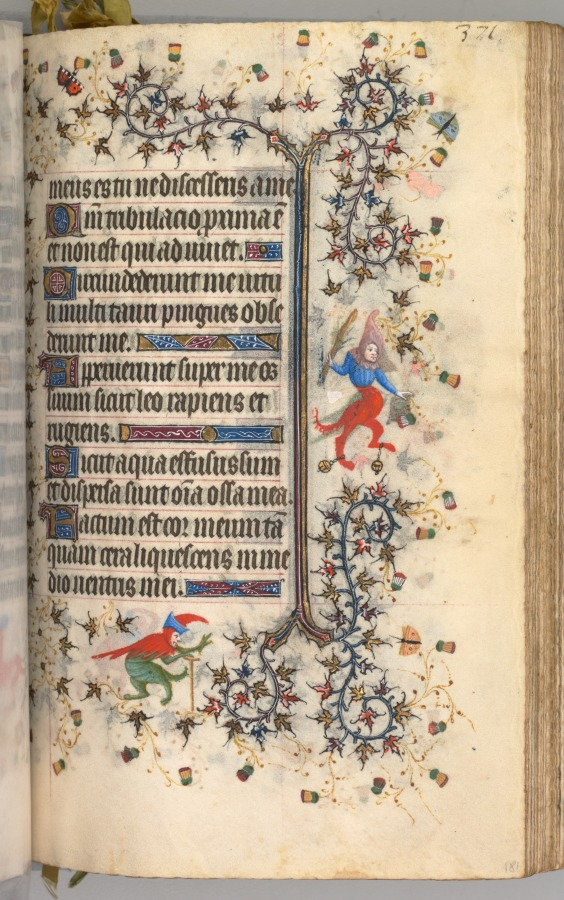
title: Hours of Charles the Noble, King of Navarre (1361-1425): fol. 181r, Text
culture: France, Paris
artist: Master of the Brussels Initials and Associates (French)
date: c. 1405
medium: ink, tempera, and gold on vellum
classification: Bound Volume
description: This precious volume was obviously highly prized by its owner, the French-born King of Navarre, who had his coat of arms painted on no less than twenty folios. Rather than directly commissioning this manuscript from a specific workshop, it seems that Charles the Noble acquired his book of hours -- perhaps ready-made for the luxury market -- while on a trip to Paris in 1404-05. A collaborative effort, six painting styles are evidenced within the pages of this codex, those of two Italians, two Frenchmen, and two Netherlanders. The painter who was responsible for the planning and decoration of the book, and who produced seventeen of the large miniatures, was a Bolognese artist known as the Master of the Brussels Initials. His principal assistant, responsible for most of the borders, was a Florentine who signed his name "Zecho" da Firenze on folio 208 verso.